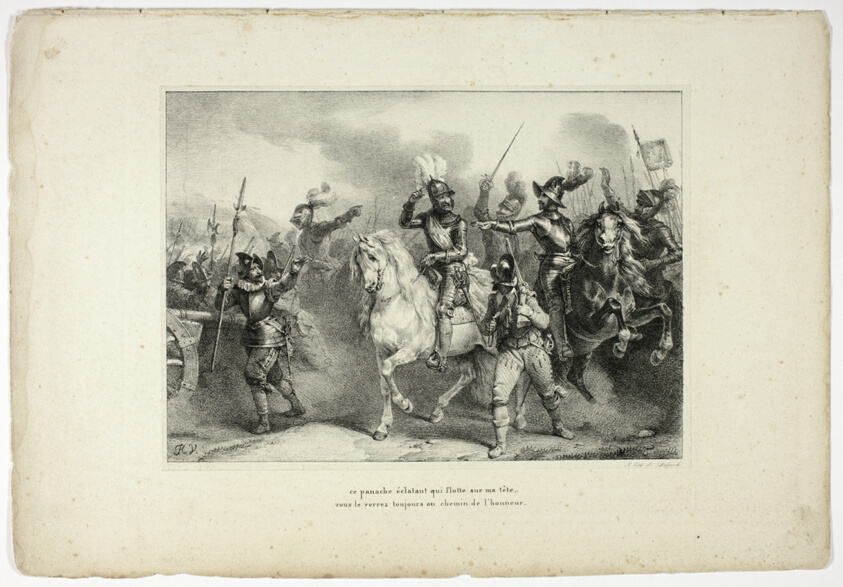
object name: Print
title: ce panache éclatant qui flotte sur ma tête...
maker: Horace Vernet (French, 1789-1863); poem by Voltaire (French, 1694-1778); printed by Francois Seraphin Delpech (French, 1778-1825); published by Dubois (French, 18th-19th century)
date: 1825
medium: Lithograph in black on ivory chine, laid down on ivory wove paper (chine collé)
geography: France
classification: lithograph; print; prints and drawing